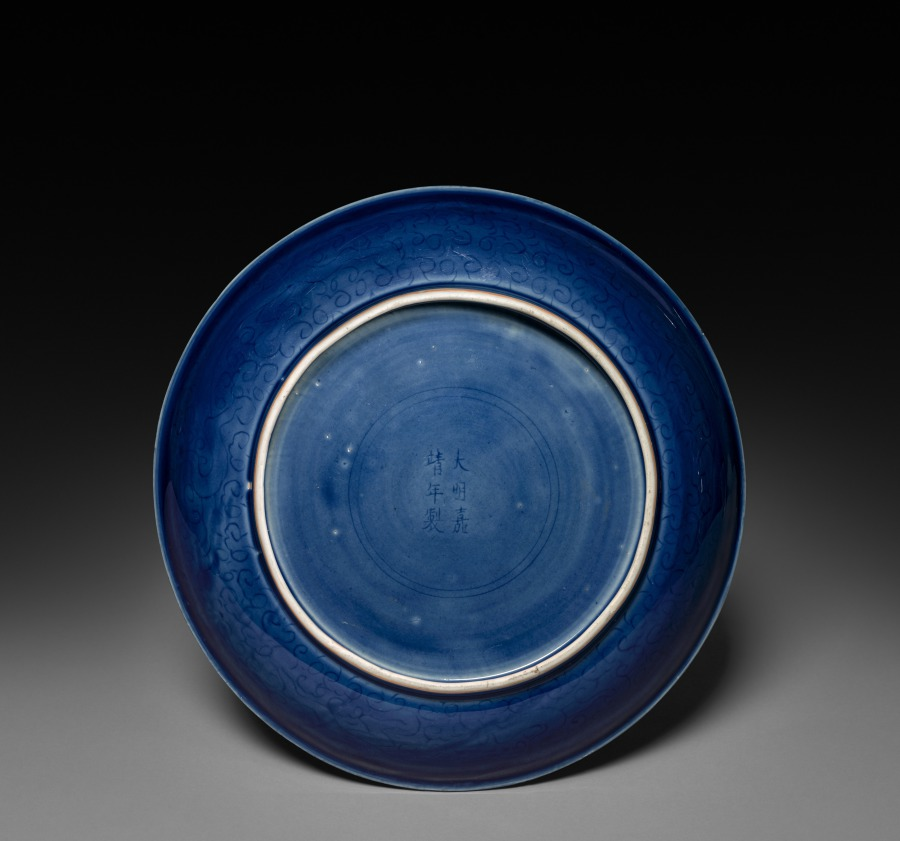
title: Dish with Dragon and Clouds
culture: China, Jiangxi province, Jingdezhen kilns, Ming dynasty (1368-1644), Jiajing mark and reign (1522-66)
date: 1522–66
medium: porcelain with incised and underglaze blue decoration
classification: Ceramic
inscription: 大明嘉靖年製